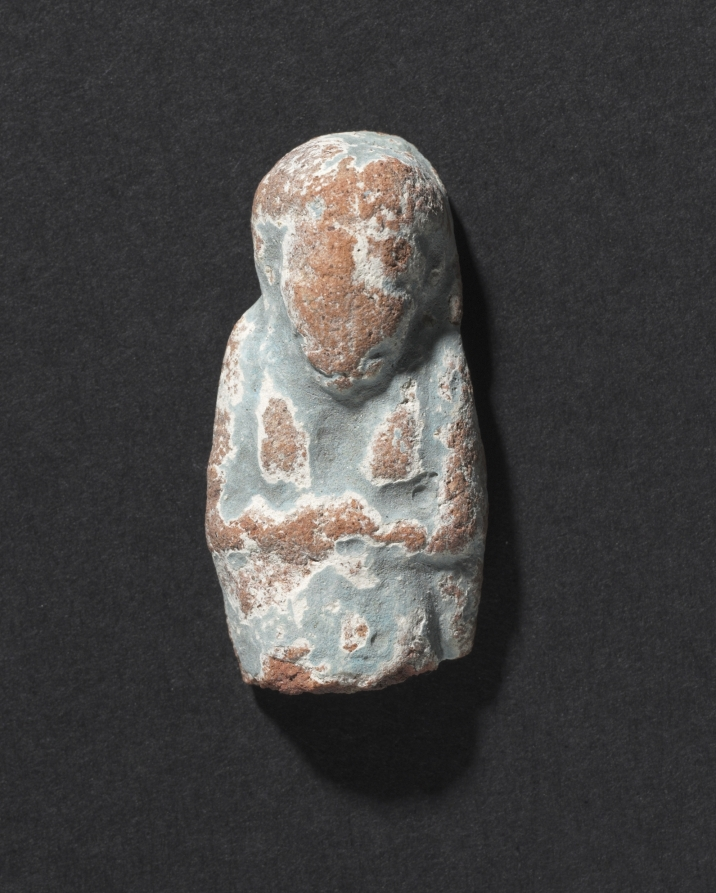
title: Shawabty of Ditamenpaankh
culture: Egypt, Late period (715–332 BCE), Dynasty 25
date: 715–656 BCE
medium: terracotta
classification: Funerary Equipment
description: High demand for shawabtys in the Late Period, a time when as many as 400 or more shawabtys were placed in the tomb with the deceased, gave rise to a specialized container for storing them: the shawabty box. This example is inscribed for the lady of the house, Ditamenpaankh, and was probably one of a pair originally made for her. The single-masted boat on the box's lid is perhaps an allusion to the pilgrimage of the deceased to the holy city of Abydos, the cult city of Osiris, king of the dead. The shawabtys inside are crude, mass-produced examples cast in an open mold. Made of terracotta, their blue paint imitates more costly shawabtys made of faience. As for the shawabty spell, it has been removed from its traditional location on the shawabty's front and relocated onto the sides of box, where it needed only to be written once, thus expediting production.